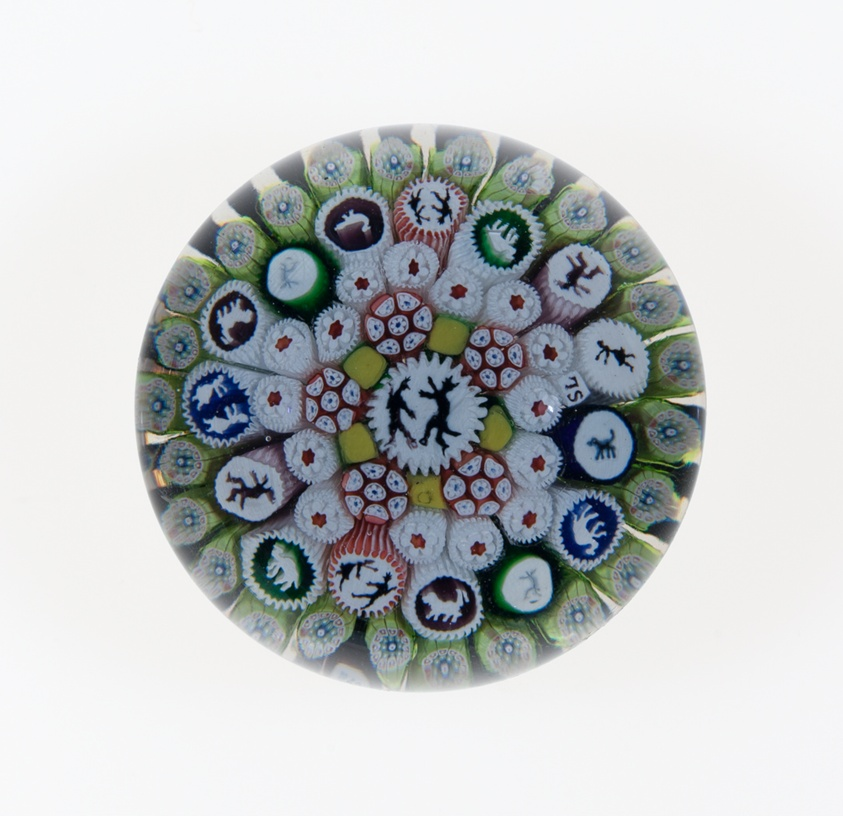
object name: Glass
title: Paperweight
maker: Saint-Louis Glassworks (Cristalleries de Saint-Louis); Lorraine, France, founded 1586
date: 1848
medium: Glass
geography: Saint-Louis-lès-Bitche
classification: paperweight; millefiori; european decorative arts; glass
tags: dogs, animals